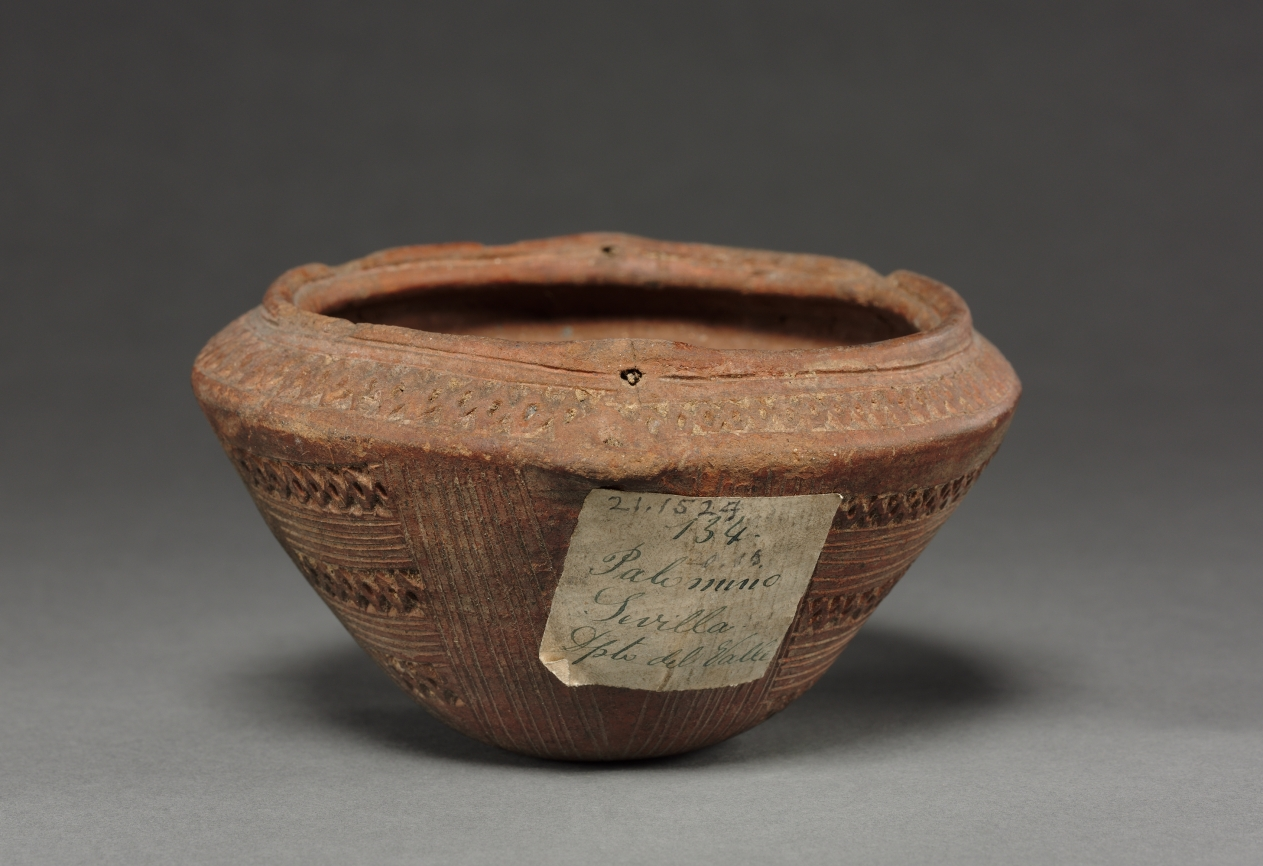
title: Jar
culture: Colombia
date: before 1550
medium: red ware with incised patterns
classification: Ceramic